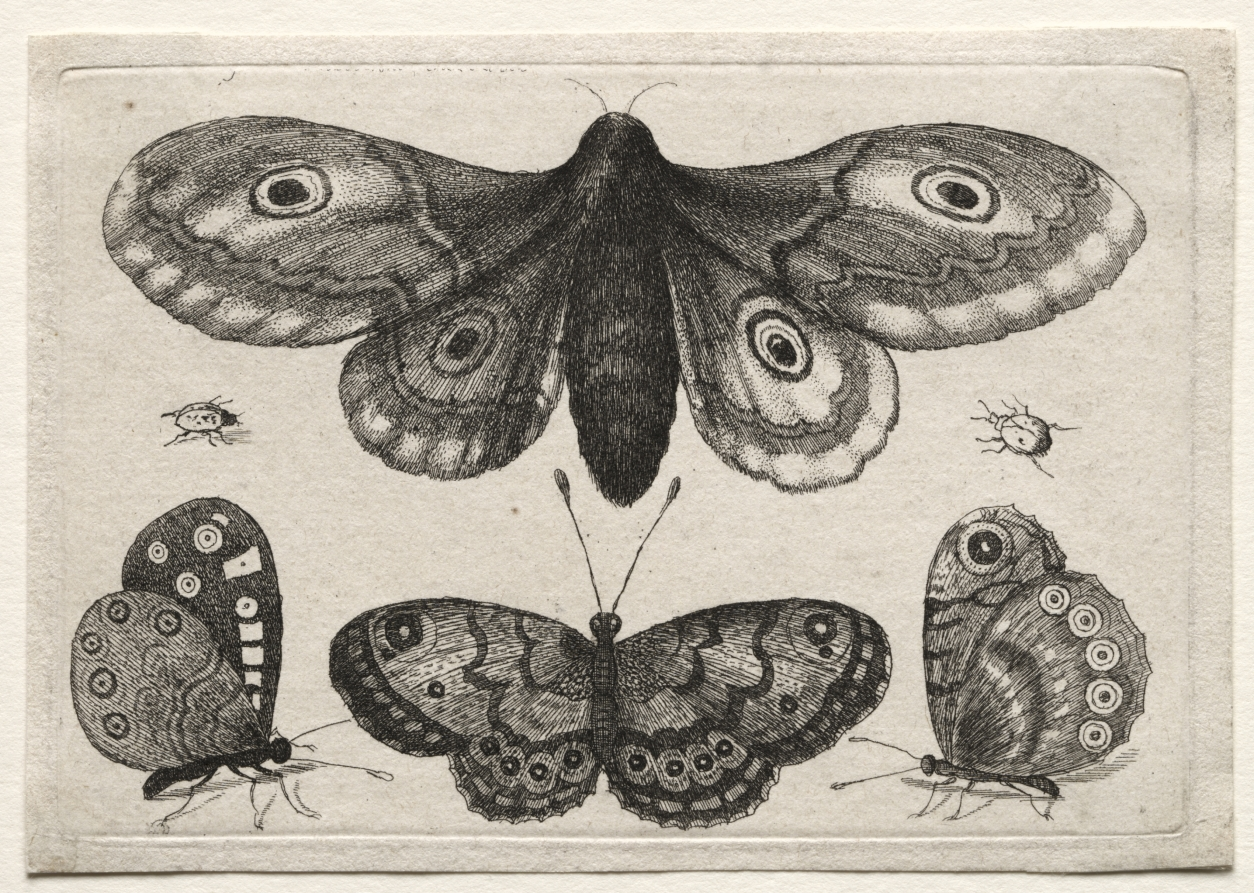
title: Muscarum Scarabeorum, vermiumque Variae Figure & Formae: A Moth, Three Butterflies and Two Beetles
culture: Bohemia, 17th century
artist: Wenceslaus Hollar (Bohemian, 1607–1677)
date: 1646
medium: etching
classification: Print